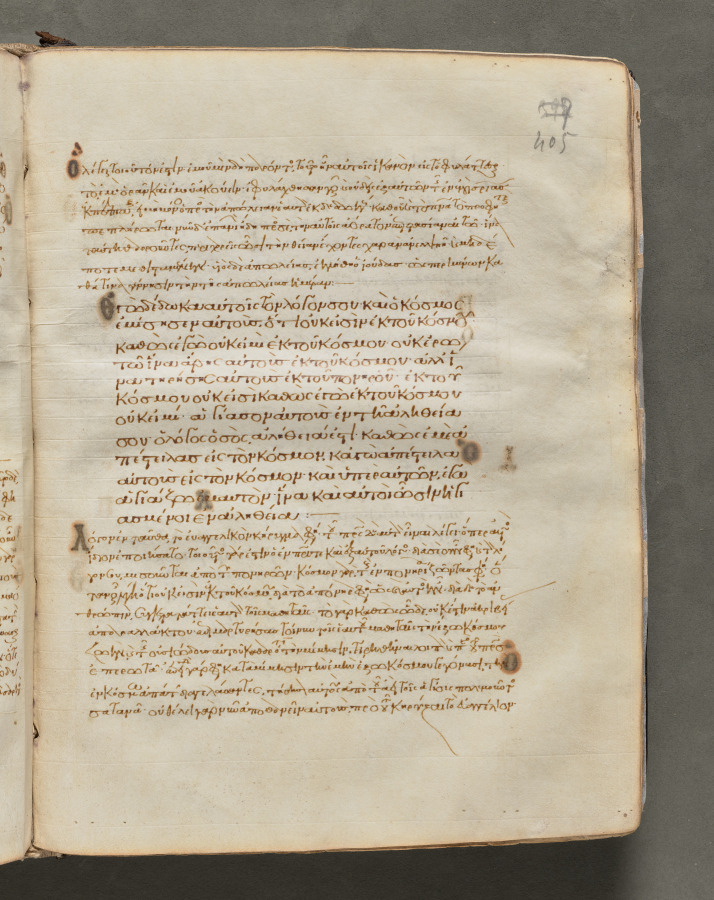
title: Text, folio 405 (recto), from a Gospel Book with Commentaries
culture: Byzantium, Constantinople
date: c. 1000–1100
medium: ink, tempera, and gold on vellum; leather binding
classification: Bound Volume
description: Each of the four gospels in this book opens on a page with brilliantly illuminated borders depicting the author of the text as well as birds—principally peacocks, symbols of the immortality of the soul—and fountains, representing the fountain of life and the salvation of the soul. This volume consists of 428 leaves with texts in Greek. Its level of sophistication suggests that it was probably written and decorated in a monastery in Constantinople.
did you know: Gospel books were carried in procession through Byzantine churches.